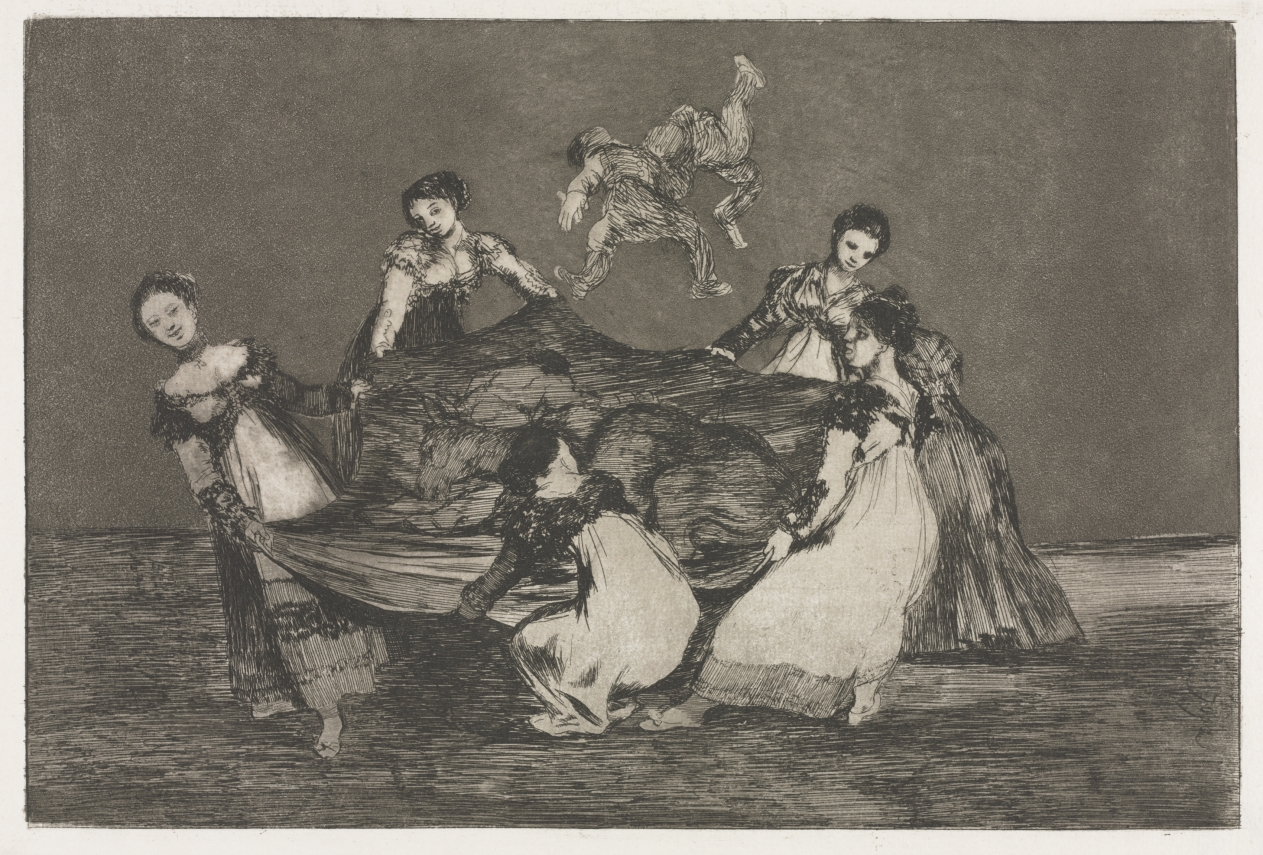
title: The Proverbs: Feminine Folly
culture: Spain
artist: Francisco de Goya (Spanish, 1746–1828)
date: 1864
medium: etching and aquatint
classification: Print